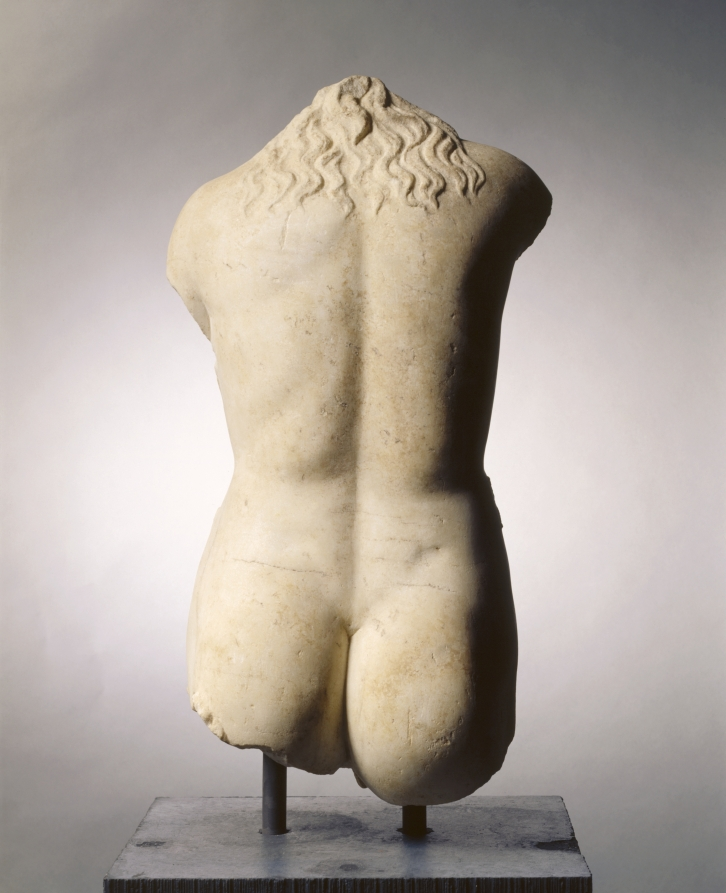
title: Aphrodite Torso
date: 200–1 BCE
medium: Thasian marble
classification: Sculpture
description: This torso can be identified through its nudity and pose as the Greek goddess of love, Aphrodite. Based on the now-lost Aphrodite of Knidos, a revolutionary marble sculpture created by Praxiteles of Athens in the mid-300s BCE, this sculpture belongs to a popular Greek and Roman type showing the goddess at her bath. With hips slightly shifted, she stood in a relaxed posture with most of her weight on one leg, probably with one hand modestly covering her pubic region and the other shielding her breasts or holding drapery. Alternatively, one or both hands may have tended to her wet hair, some of which falls over her neck and upper back.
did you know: This torso is based on the Aphrodite of Knidos, a Greek original by the master sculptor Praxiteles.